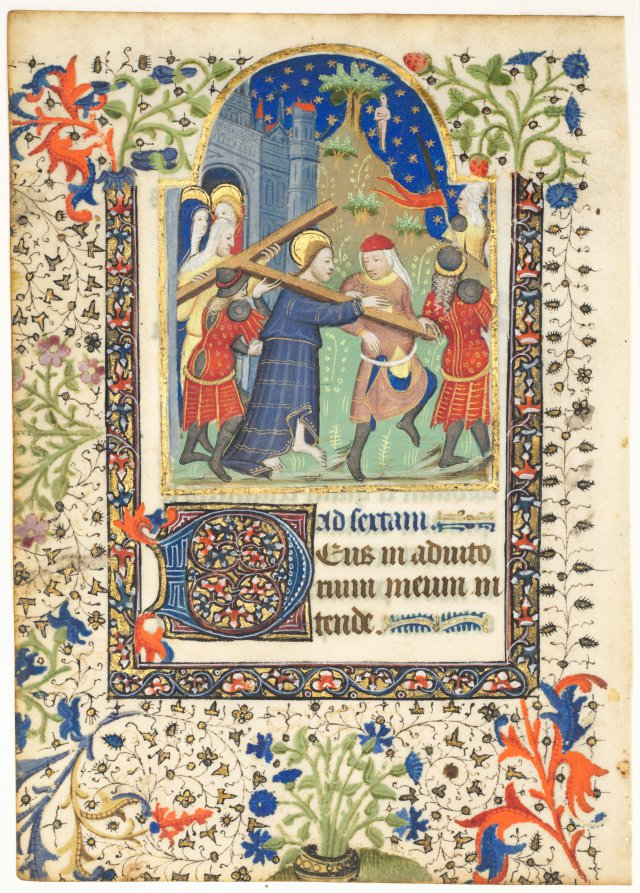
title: Leaf from a Book of Hours: Christ Carrying the Cross (Sext, Hours of the Cross)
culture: France, Brittany(?), 15th century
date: c. 1410–1420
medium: ink, tempera and gold on vellum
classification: Manuscript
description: Within books of hours, the Hours of the Cross normally received only one miniature, a Crucifixion, as its introduction. There are exceptions, however, and in some books of hours a Passion cycle of seven miniatures, one for each hour (except Lauds), might be found. The present leaf with its miniature of Christ Carrying the Cross would have been part of such a cycle of pictures in which it introduced the Hour of Sext (confirmed by the rubric, Ad Sextam). The composition shows Christ laboring to support the weight of the cross as he journeys to Calvary. The Virgin and Saint John appear at the far left as the group exits the gates of Jerusalem. In the background, the body of Judas is seen suspended from a tree high upon a hill.